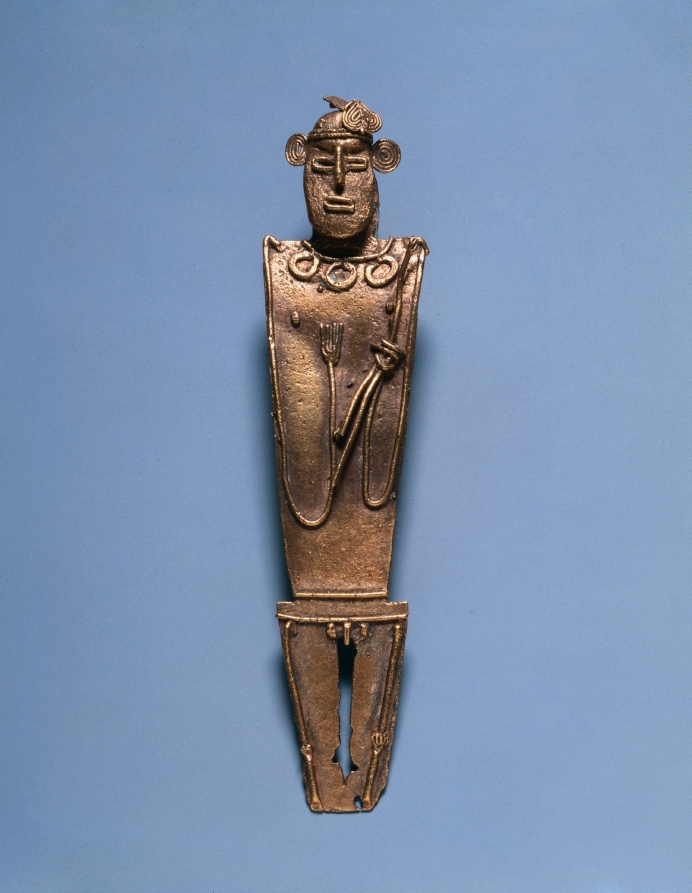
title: Tunjos (Votive Offering Figurine)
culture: Colombia, Muisca style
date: c. 900–1550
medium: cast gold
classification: Metalwork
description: Unlike the other gold ornaments made in the isthmian region, tunjos were not worn; instead, they served as offerings that were deposited in sacred places such as lagoons and caves. They often depict humans who hold something. Perhaps because they were not meant for display, tunjos were not finished after lost-wax casting. Flaws remain uncorrected, surfaces are unpolished, and gold that backed into the channel used to pour the molten metal into the mold was left in place.